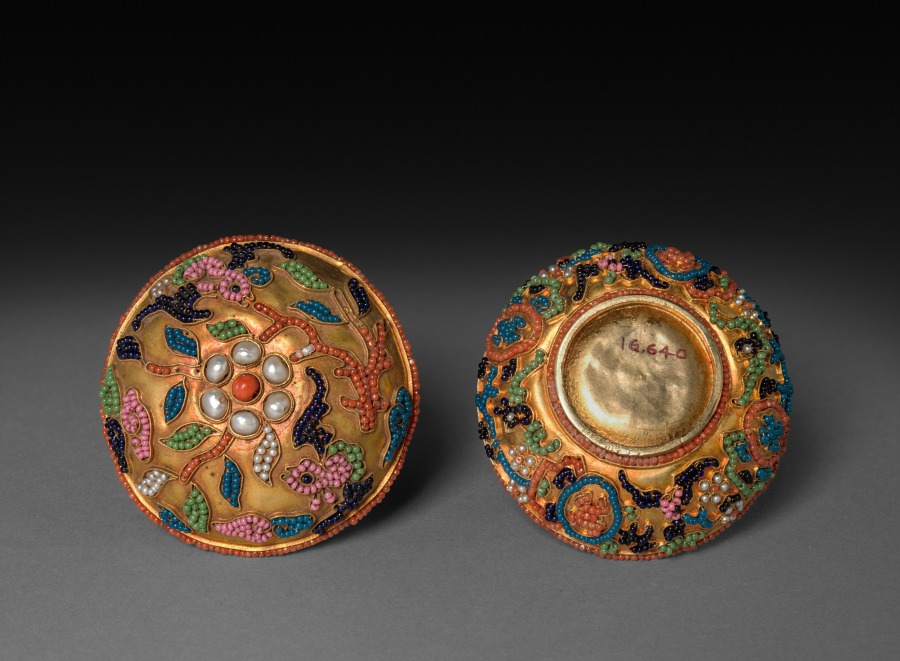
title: Box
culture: China, Qing dynasty (1644-1911)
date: 19th Century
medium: metal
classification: Metalwork